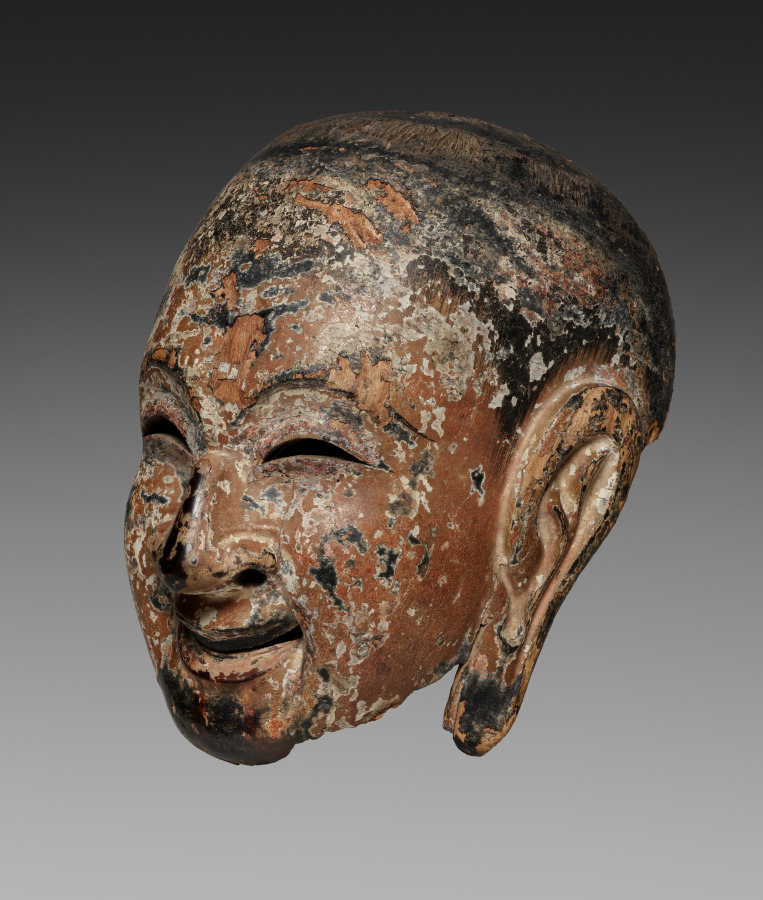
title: Gigaku Mask of Young Persian Boy (Taikōji)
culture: Japan, Nara period (710–94)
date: 710–94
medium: paulownia wood, lacquered and painted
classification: Sculpture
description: This mask is for the role of the son of an old Persian widower in gigaku, a theatrical dance repertoire imported to Japan from continental Asia during the seventh century. The old man and his sons mime prayers to the Buddha. While the mask would cover the entire head of the actor, there are openings for the eyes, nostrils, and mouth.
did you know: This is the mask for one of two sons who accompany a widower in ancient dance theater.